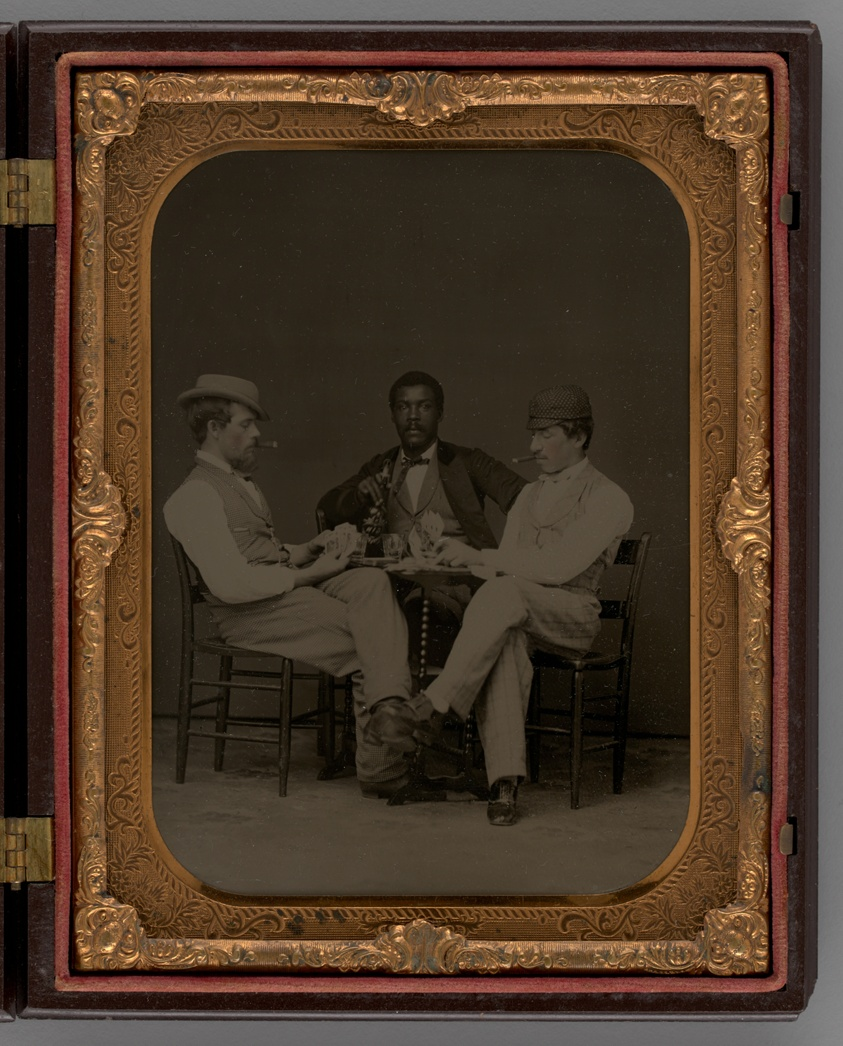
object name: Photograph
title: Untitled (Three Men Playing Cards)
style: 19th century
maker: Unknown maker; American, 19th century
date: 1865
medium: Ambrotype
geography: United States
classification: portrait; ambrotype; photograph; photographic process; photography; portrait; tintype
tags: portraits: African American subject, portraits: multiple subjects, portraits: male subject, portrait, Male, cards, lundberg collection, African American, portraits